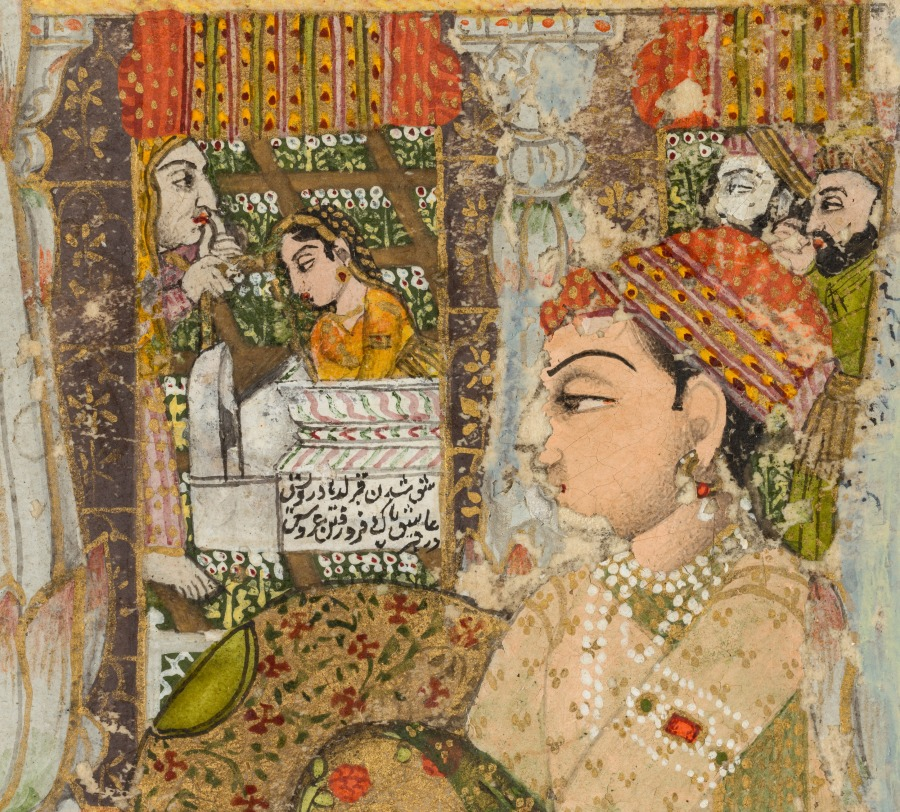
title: Lovers and beloveds: A composite of scenes from Persian, Urdu, and Sanskrit literature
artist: Chitarman II (Indian, c. 1680–с. 1750)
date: c. 1735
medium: Gum tempera and gold on paper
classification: Painting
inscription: Persian inscriptions throughout, in nasta‘liq script: Top left: The celebrated lover Ranjha; Top right, above awning: The notable ladies of the city falling into a swoon having caught sight of Joseph’s beauteous countenance; Top center, on pillar beneath canopy: The celebrated lover Vamiq; On another pillar, behind the woman’s head: The celebrated beloved ‘Azra; Upper left, on pillar: King Nala, the lover; Central figure with halo: The coming from the prison and sitting [in state] of the Lord Joseph the Prophet, with the women of the town cutting the palms of their hands and falling down unconscious; Left of center: [. . . cutting palms . . . wine cups fell from their hands . . . state of wonderment . . .]; Central pavilion at left: Sassi, the beloved the lover [Punnun]; Below central figure of Joseph: The stream of milk Shirin the beloved, weeping The death of Farhad, the lover; Lower right, in front of bearded man: Hafiz of Shiraz; Below his decanter: The stick of candy [referring to the woman with whom, according to popular lore, Hafiz was supposed to have fallen in love as a youth]; Behind the pavilion at right: Bride descending into a grave . . .; On the white railing to the left: Khwaja Bu Ali . . .; Bottom left: Queen Padmavati, the beloved, King Ratnasena, the lover; Bottom right: Majnun, the lover; On page held by Majnun: Say, “He is Allah, who is One, Allah the eternal refuge. He neither begets nor is born, Nor is there to Him any equivalent.” [Qur'an, chapter 112]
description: The figure of Joseph, identified by his halo, sits in the center near the top of this painting of heroes and heroines of ten different Persian, Urdu, and Sanskrit romances. The depicted scene occurs after Joseph has been purchased by Zulaykha in Egypt. Zulaykha, wishing to show him off to her friends and acquaintances, invites them to her home where she supplies oranges and knives. When the women see Joseph, they all are so distracted by his divine beauty that they accidentally cut their hands while peeling their oranges, but remain mesmerized by his appearance. The dramatic scene in the center is from the Persian romance of Khusrau and Shirin, in which Farhad, a stonecutter who loved Shirin, threw himself to his death from a mountaintop after hearing news of Shirin’s death, falsely sent to him from his rival Khusrau. The emaciated Majnun is in the lower right corner. Every vignette has been identified with a tiny Persian inscription.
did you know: Below the bearded poet Hafiz is the woman he loved; her name was Stick of Candy.